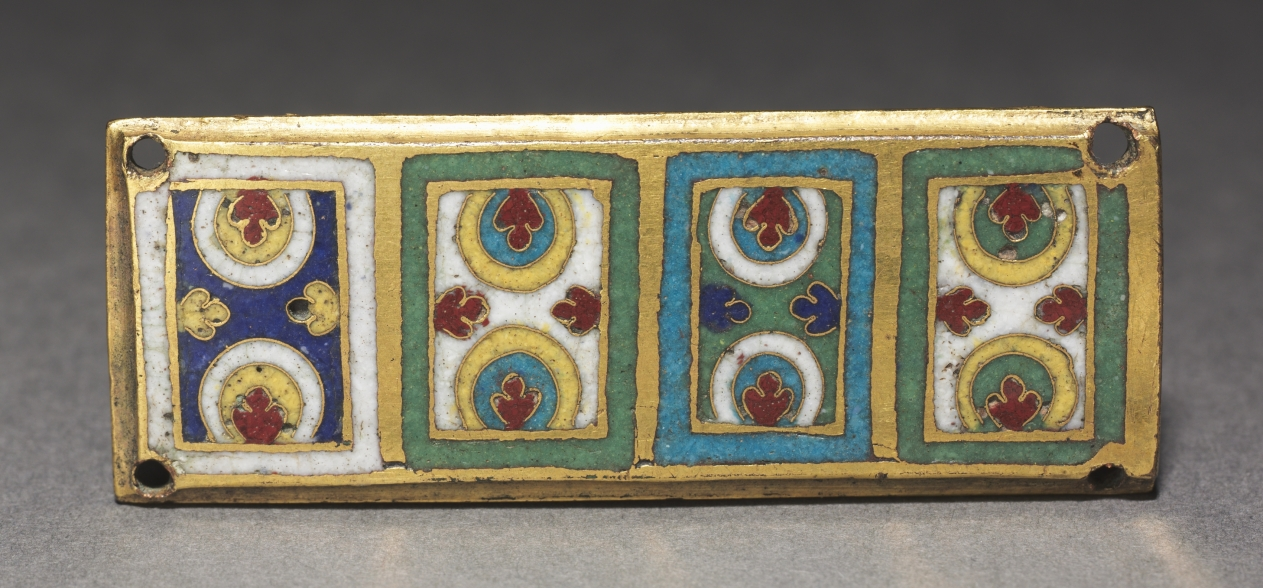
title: Plaque from a Reliquary Shrine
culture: Germany, Rhine Valley, Cologne, Romanesque period, 12th century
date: c. 1170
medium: gilded copper; champlevé and cloisonné enamel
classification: Enamel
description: These decorative enamel plaques (1953.274, 1953.638, 1957.502, and 1961.27) have been linked to some of Cologne's most important reliquary shrines, namely the shrine of the Three Kings at Cologne Cathedral and the shrines of Saints Maurinus and Albinus in the Benedictine abbey church of Saint Panteleon.